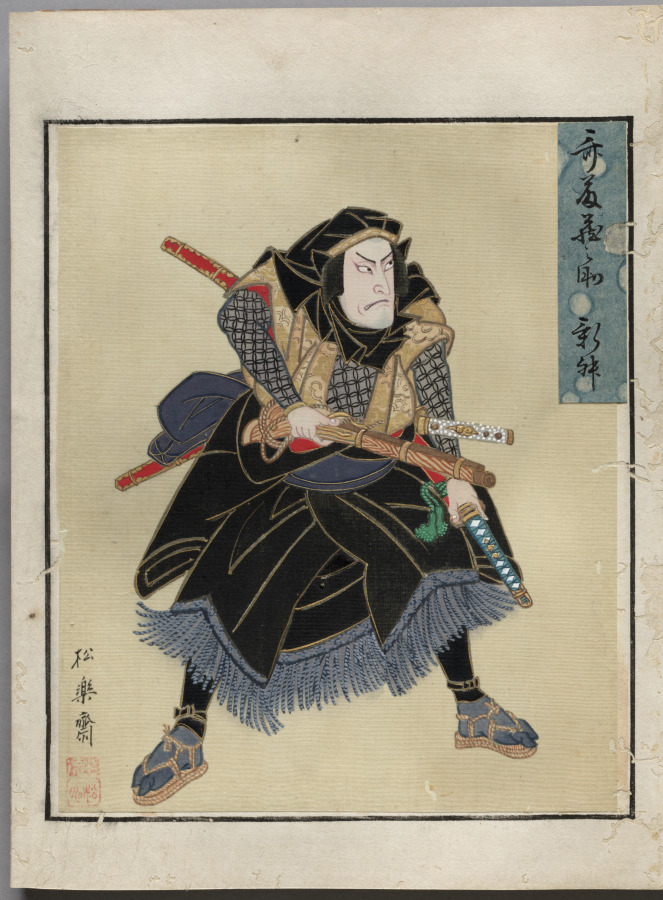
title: Double-Leaf from Album of Actor Portraits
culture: Japan, Edo period (1615–1868)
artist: Shōrakusai (Japanese)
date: c. 1790–1810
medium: double-leaf from an accordion-style album; ink and color on silk (left)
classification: Bound Volume